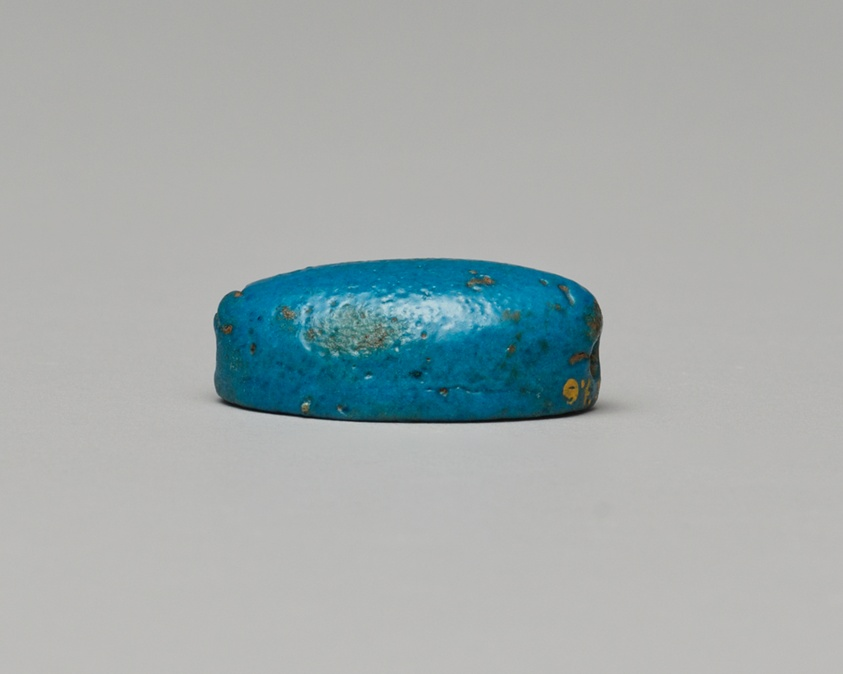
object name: Costume and Accessories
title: Cowroid: The King’s Wife, Tiye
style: new kingdom, ancient, eighteenth dynasty, egyptian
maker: Egyptian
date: New Kingdom, Dynasty 18, reign of Amenhotep III (about 1390–1352 BCE)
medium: Faience or steatite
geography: Egypt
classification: scaraboids; jewelry; amulet; ancient art; costume; faïence (composite material)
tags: Hieroglyphs, queens